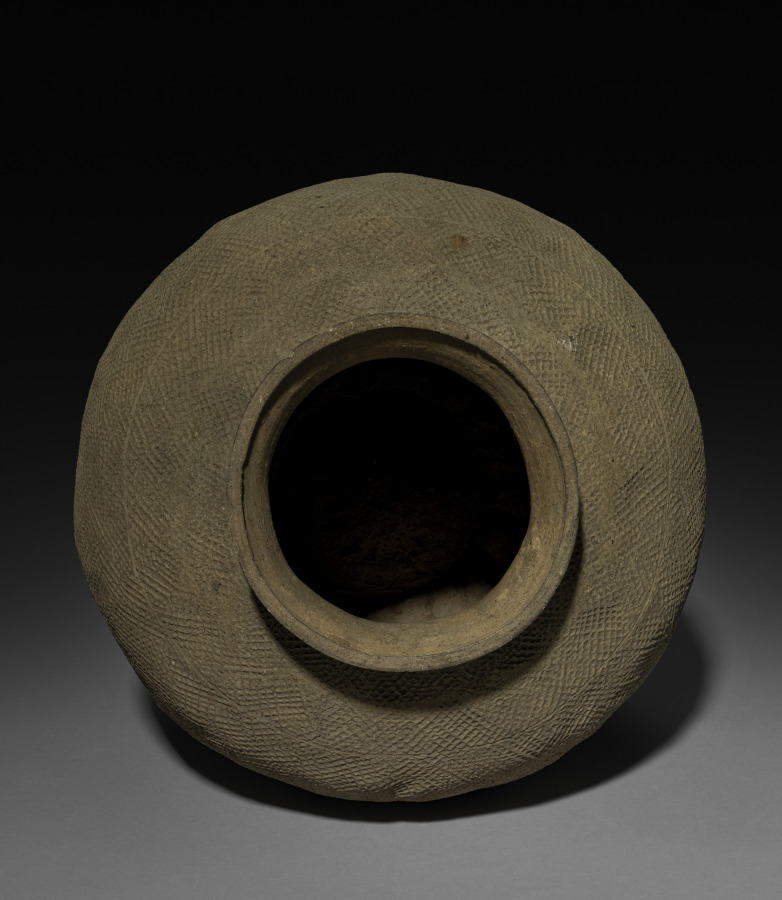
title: Jar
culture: China, Hunan province, reportedly Changsha, Eastern Zhou dynasty (770–256 BCE), Warring States period (475–221 BCE)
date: 481–221 BCE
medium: earthenware with stamped decoration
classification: Ceramic